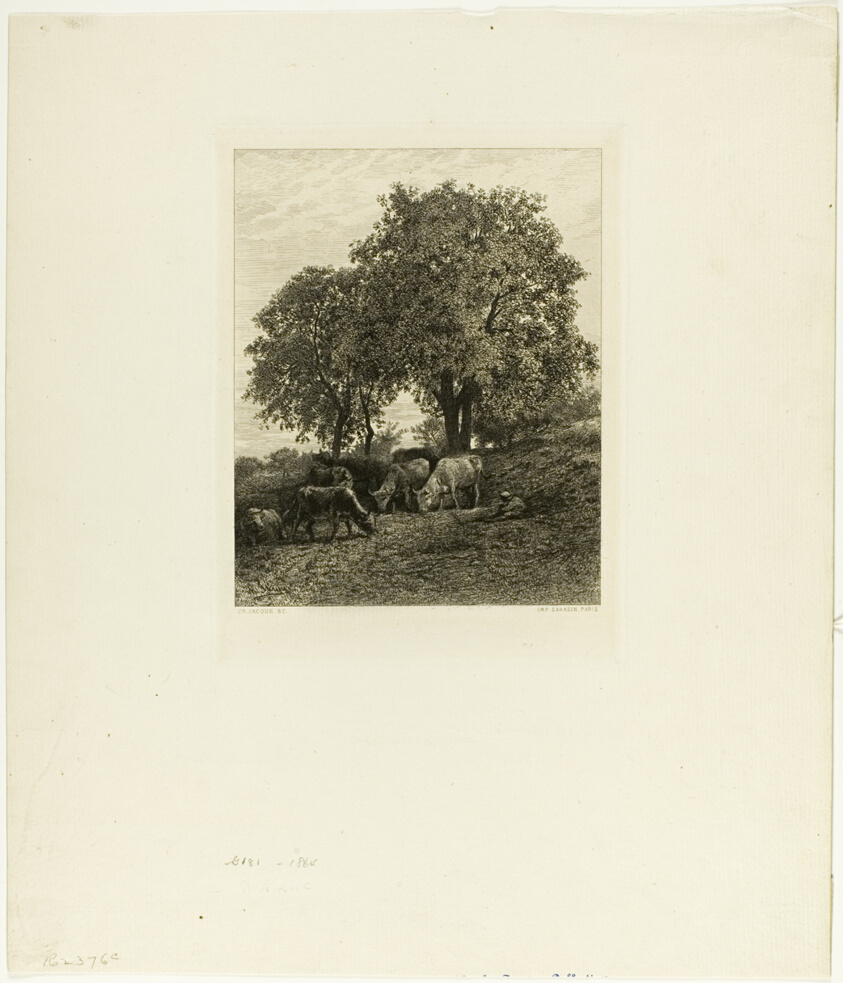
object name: Print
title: The Rest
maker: Charles Émile Jacque (French, 1813-1894); printed by Sarazin (French, 19th century)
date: c. 1865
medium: Etching, engraving and roulette on ivory laid paper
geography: France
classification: etching; print; prints and drawing